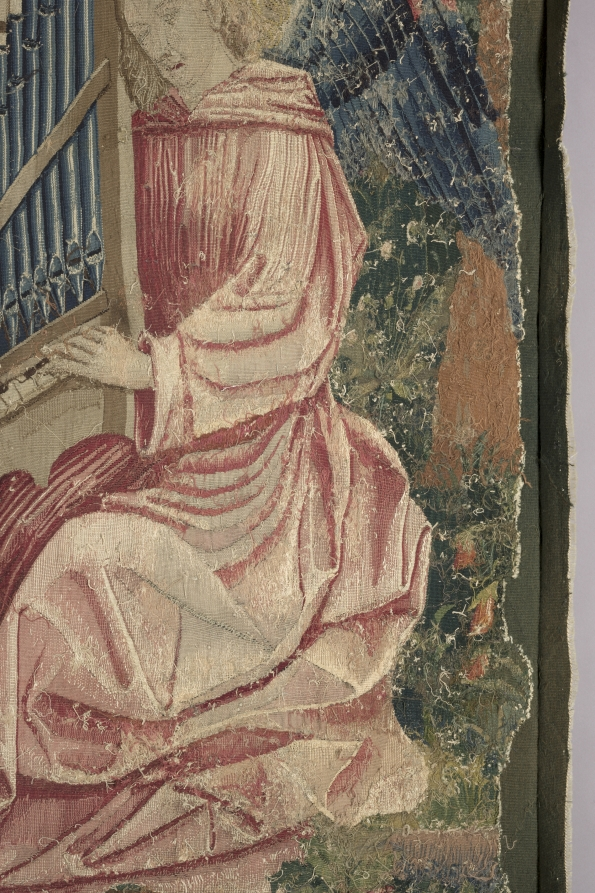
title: The Triumph of Eternity (from Chateau de Chaumont set)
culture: France, Lyon(?), early 16th century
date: 1512–15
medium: silk and wool; tapestry weave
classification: Tapestry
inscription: French verse in Gothic letters translates as follows: "Nothing triumphs by right authority, Unless it be conducted by Eternity. Nothing is permanent beneath the firmament, But above us triumphs Eternity."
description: The Triumph of Eternity is represented by the Coronation of the Virgin. Dressed in crimson velvet with an opulent brocaded velvet shawl, the Virgin is seated in the center as two angels hold a crown over her head. Five musical angels surround her playing an organ, recorder, straight cornetto, harp, and lute, while another sings from an open music book. The scenes in the set display a conservative style in which the figures are placed in shallow landscapes, thereby ignoring pictorial innovations for depicting space and mass. The verse in Old French at the top states: Nothing triumphing by due authority Remains permanent and durable. Nothing is permanent under the heavens, But above, eternity triumphs.